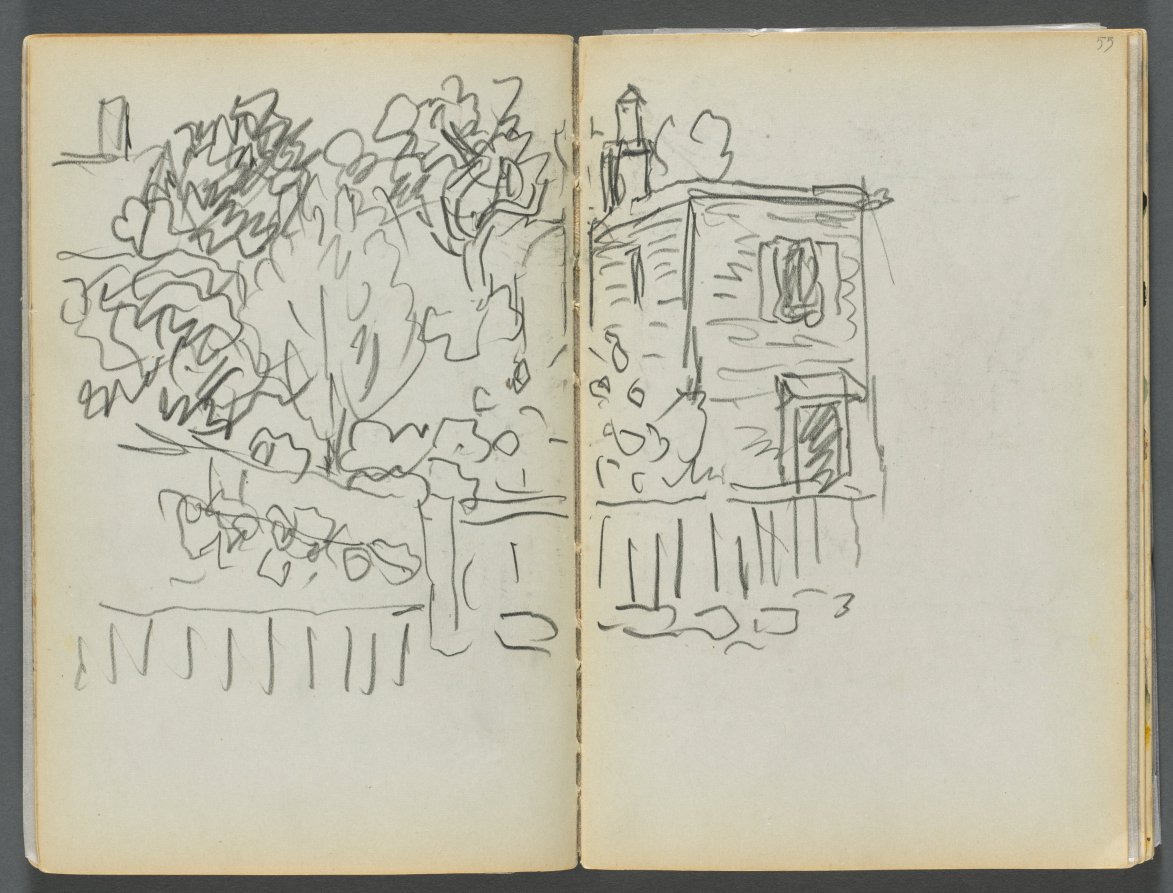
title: Sketchbook- The Granite Shore Hotel, Rockport, page 054 & 55: House and Fenced Garden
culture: America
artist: Maurice Prendergast (American, born Newfoundland [now Canada], 1858–1924)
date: 1905–10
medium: graphite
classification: Bound Volume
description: This sketchbook contains 72 pages of pencil drawings and 9 watercolors of Cape Ann. On the inside of the cover Prendergast wrote the address of the Granite Shore Hotel in Rockport, Massachusetts.